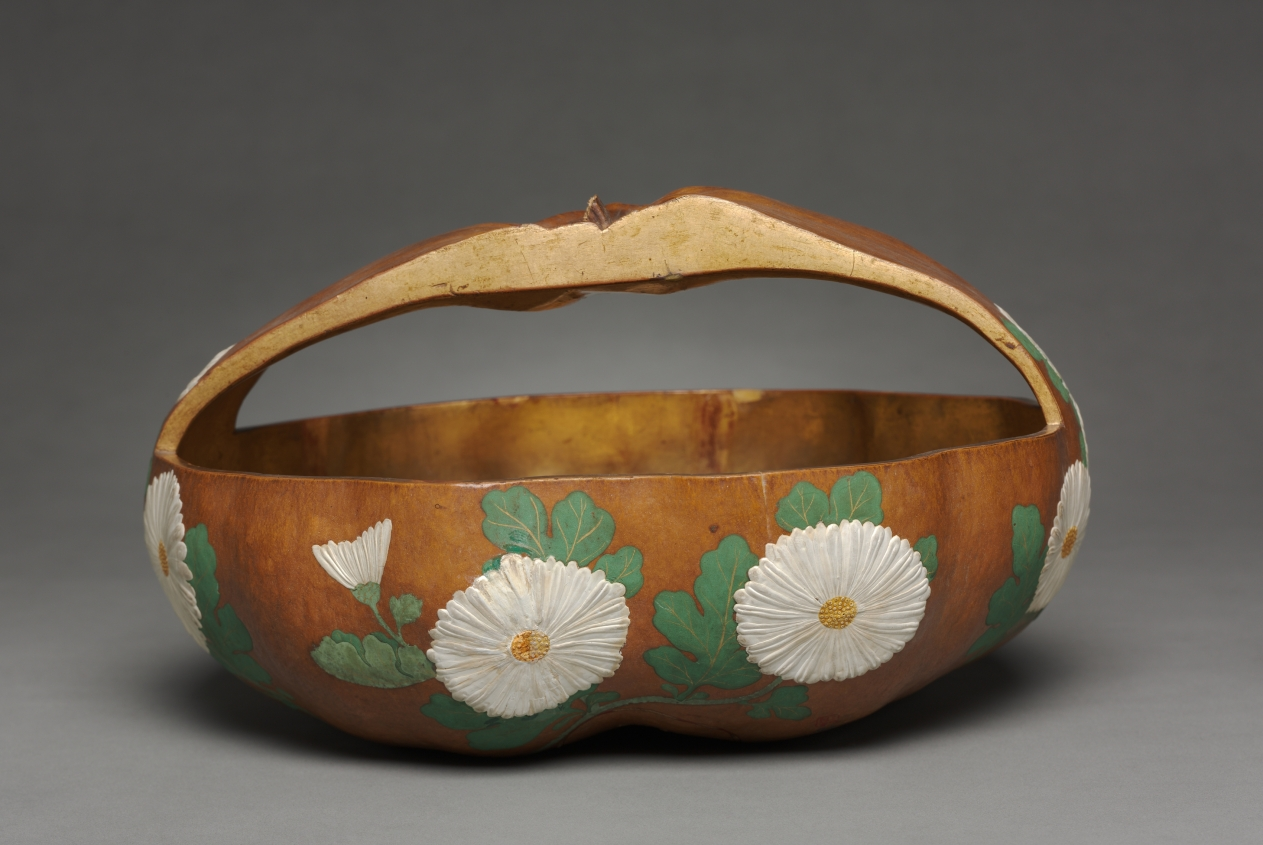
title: Gourd Basket with Chrysanthemum Design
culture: Japan, Edo period (1615–1868)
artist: attributed to Ogata Kōrin (Japanese, 1658–1716)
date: 1700s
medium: gourd; lacquered and painted with gesso, color, and gold pigments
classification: Miscellaneous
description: This very rare basket is made from a carved gourd and inscribed on the bottom with the signature of Ogata Korin (1658– 1716), a painter and lacquerer who founded the Rimpa school. Here, he applied the chrysanthemums with white gesso in relief. This basket is decorated with opaque green paint, and its inside is lined with gold.